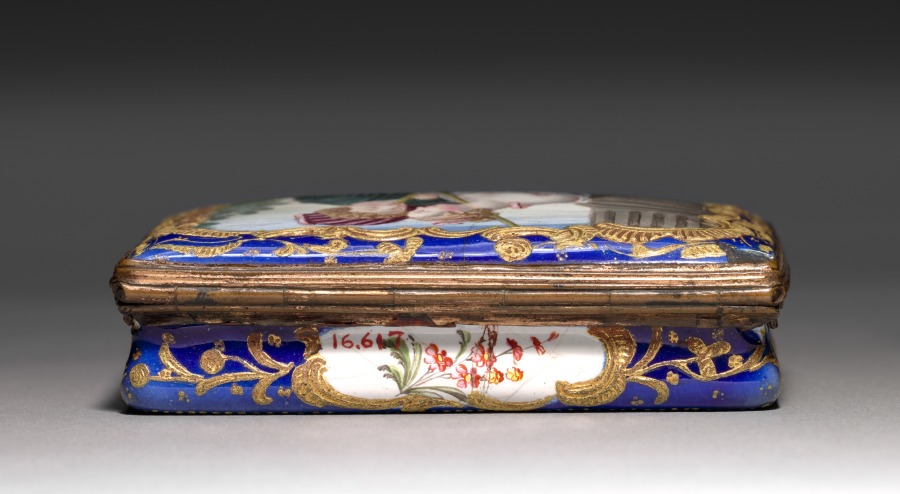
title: Snuff Box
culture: England, South Staffordshire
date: c. 1770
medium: enamel on copper, gilt metal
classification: Miscellaneous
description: Luxurious personal objects, like this snuff box, were an essential part of a privileged wardrobe during the 1700s and early 1800s, emphasizing their owner’s refinement and wealth. Their glittering surfaces, however, disguised a system based on the labor and suffering of enslaved or indentured people, whether in gold or stone mines, tobacco farms, or shops where these goods were made. Like cotton, sugar, and tea, snuff came from British colonies in America, India, and the Caribbean, where enslaved people were exploited to grow these crops under extremely harsh conditions. Slavery was not abolished in much of the British Empire until 1833. Britain and other European nations continued to pursue colonialism with a sense of superiority that found its way into all aspects of life, including decorative objects glorifying their conquests.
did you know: This small, elaborate box held snuff, a form of powdered tobacco that was inhaled in tiny amounts.